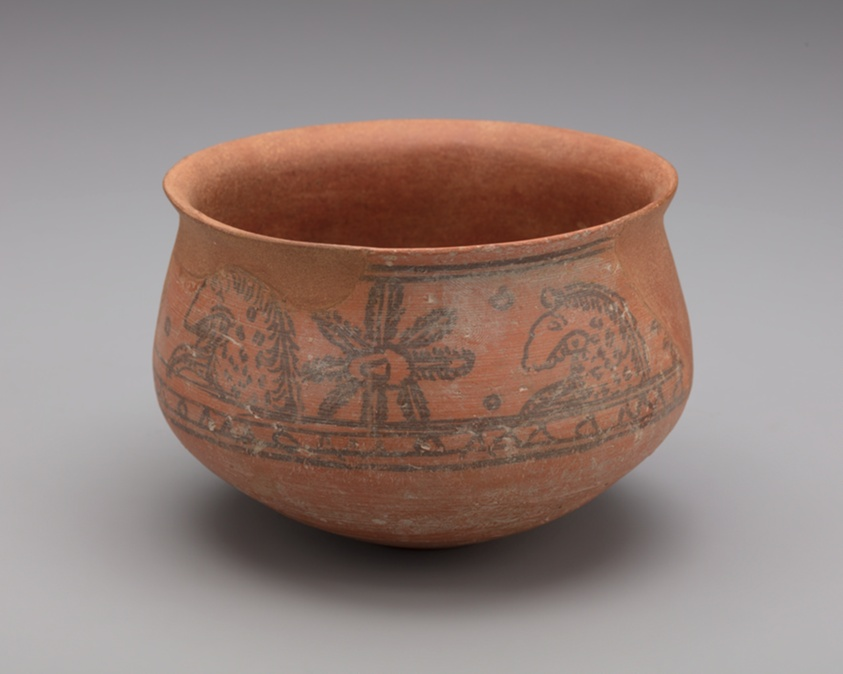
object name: Vessel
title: Painted Bowl with Faunal and Floral Design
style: South Asian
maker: Pakistan; Ancient region of Gandhara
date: 5th century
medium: Terracotta with black pigment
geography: Gandhara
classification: bowl; earthenware; dish (vessel); ceramics; asian art; vessel